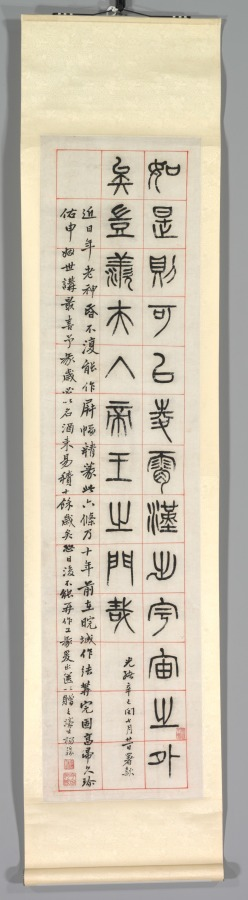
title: On Happiness, Calligraphy in Seal Script Style (zhuanshu)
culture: China, Changsu, Qing dynasty (1644-1911)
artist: Yang Yisun (Chinese, 1813–1881)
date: 1871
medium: hanging scroll, ink on paper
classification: Painting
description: Yang Yisun transcribed this ancient text on six narrow scrolls, starting at the top right and ending at the bottom left. Yang emphasizes the text’s historic nature by using the seal script style found on stone steles and bronze vessels. On Happiness features reflections of a scholar on a leisurely life in the countryside, composed by Han dynasty official Zhongchang Tong, who died the year the Han dynasty collapsed (AD 220). The idyllic life described in the text may bean evocation of the past in a time of national crisis. A decade before Yang wrote these scrolls, Anglo-French forces had looted and burned the Summer Palace in Beijing. At the same time, the domestic Taiping rebellion (1850–64), led by a religious fanatic to overthrow the Qing government, had devastated Yang’s homeland, the Jiangnan region, with an estimated 20 million lives lost.